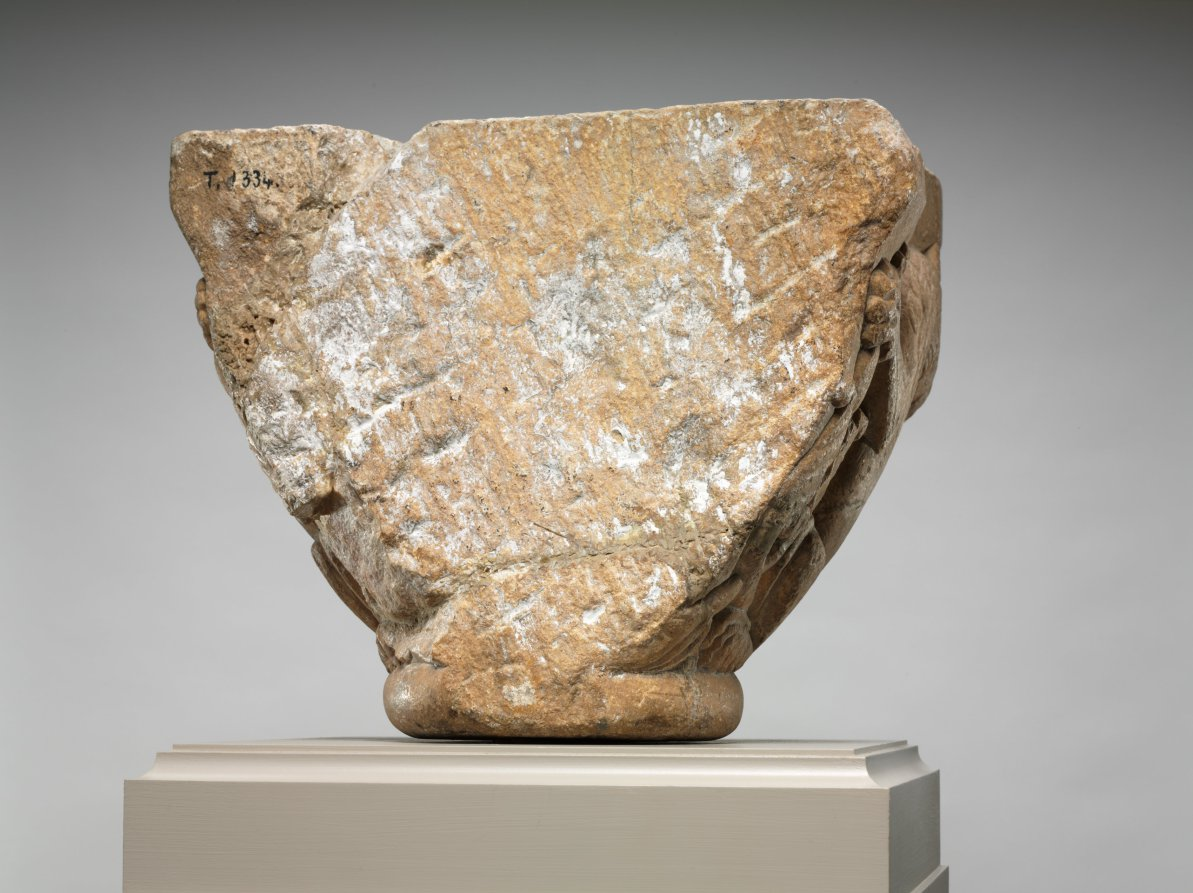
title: Engaged Capital with Lions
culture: Northern Spain (Navarre ?) or Southwest France (Pyrénées or Roussillon ?), mid-12th century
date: 1145–64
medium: marble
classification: Sculpture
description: The compositional motif of confronted and addorsed beasts illustrated on this capital was especially popular in churches along the pilgrimage roads.